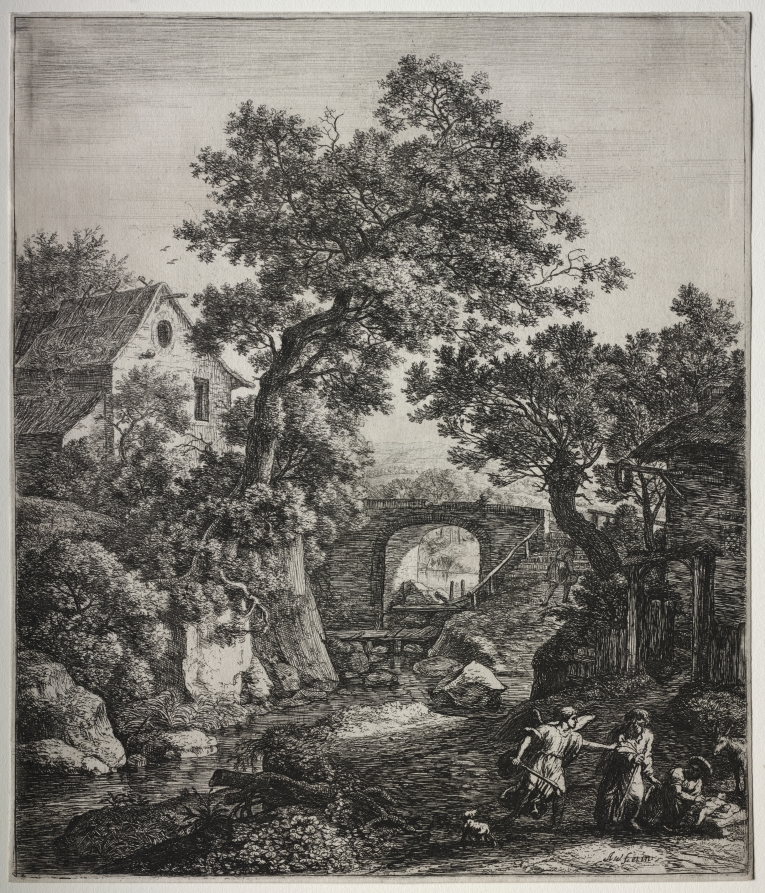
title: Six large upright landscapes with scenes from the Old Testament: Zipporah Circumcising Her Son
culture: Netherlands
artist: Anthonie Waterloo (Dutch, 1609/10–1690)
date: 1640–90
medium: etching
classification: Print